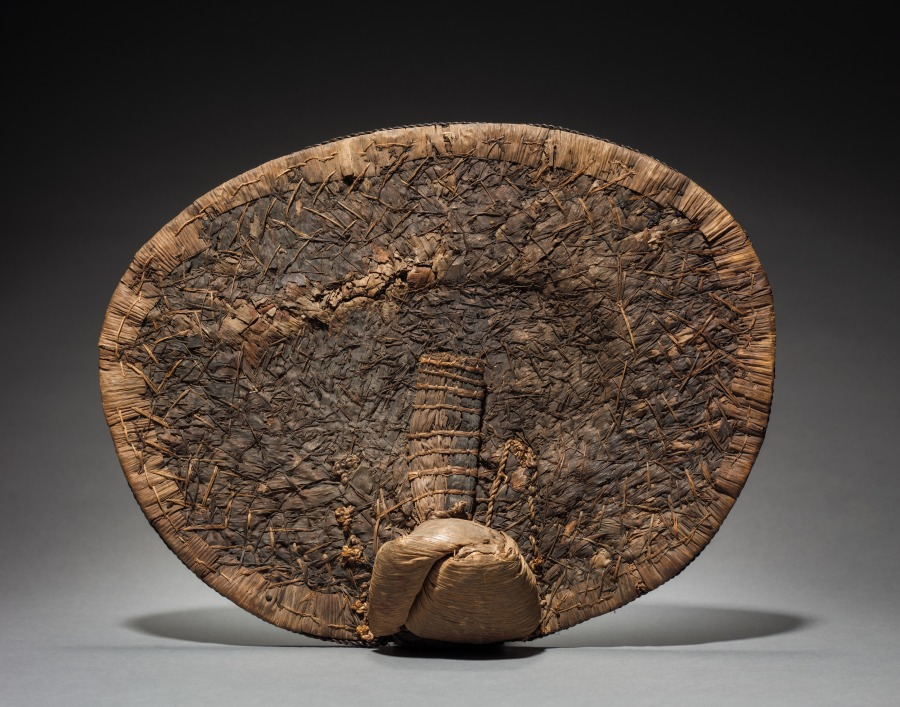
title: Back Skirt/Sitting Pad (negbe)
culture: Africa, Central Africa, Democratic Republic of Congo, Mangbetu-style makers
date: by 1928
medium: Plant fibers and dye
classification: Garment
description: Egbe (singular: negbe) were fashionable and practical garments aristocratic Mangbetu women made for special occasions. Worn over a skirt, it tied onto a girdle along with a frontal “apron.” The curved interior piece rested on the lower back. Thickly woven, flexible natural fibers bent with the body, cushioning the wearer’s behind when sitting. When the woman was standing, the decorated flat portion faced outward, showing off bold geometric motifs. Egbe were among items sold to foreigners at the Mangbetu king’s encouragement as the Mangbetu actively constructed their self image for outsiders during the 1920s and 1930s.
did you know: A contemporary fashion in 1929, when it was purchased or collected, this egbe is now a historical document of past styles.